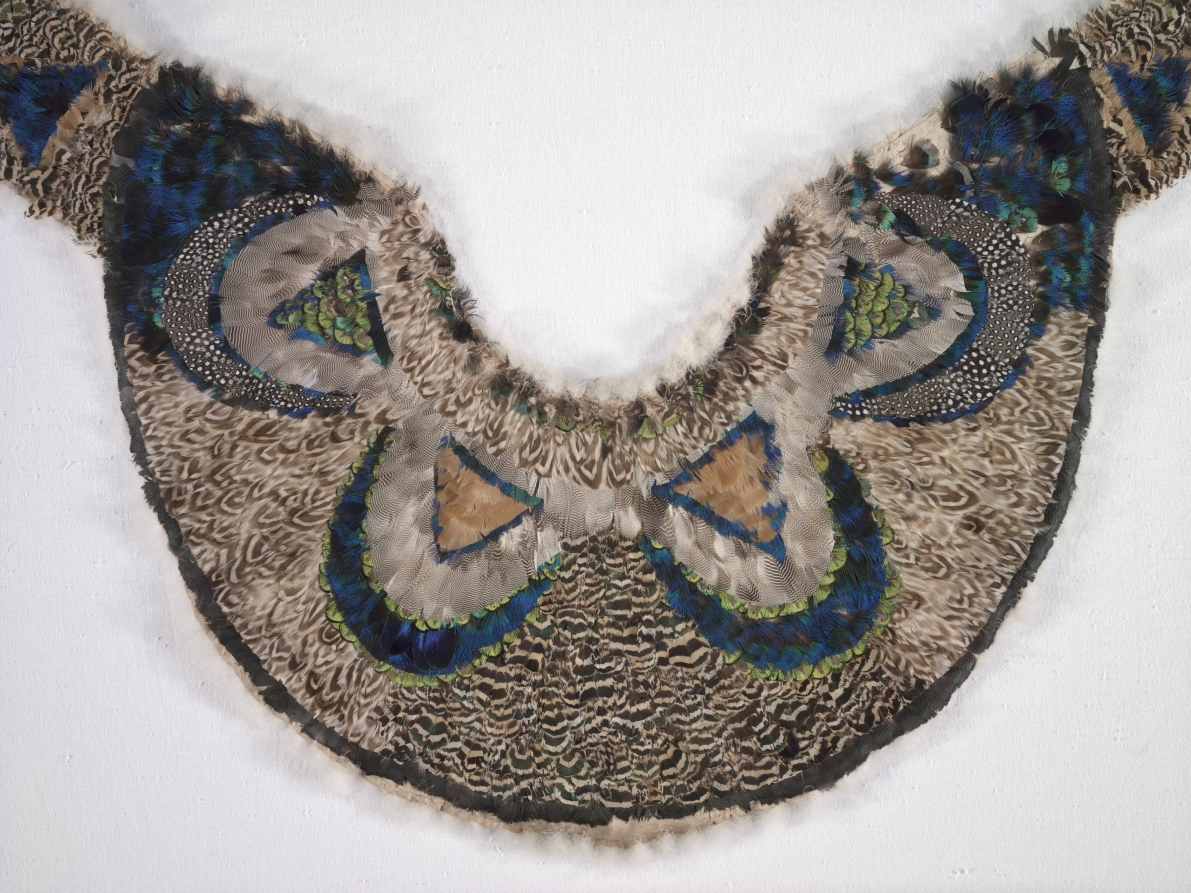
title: Pelerine (Collar or Cape)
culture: Northeastern Woodlands, Great Lakes/St. Lawrence River Region or Europe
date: c. 1830–1860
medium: Cotton, peacock feathers, guinea fowl feathers?, Gadwalls duck feathers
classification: Textile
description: Experts argue about collars of this type: Did a Great Lakes native artist make it, using as a model an English lady’s pelerine and exotic feathers obtained through trade? Or was the collar created by a European feather worker, perhaps after seeing the spectacular feather capes of native Hawaiian royals who visited England in 1824? There are arguments for both views—and for further research.